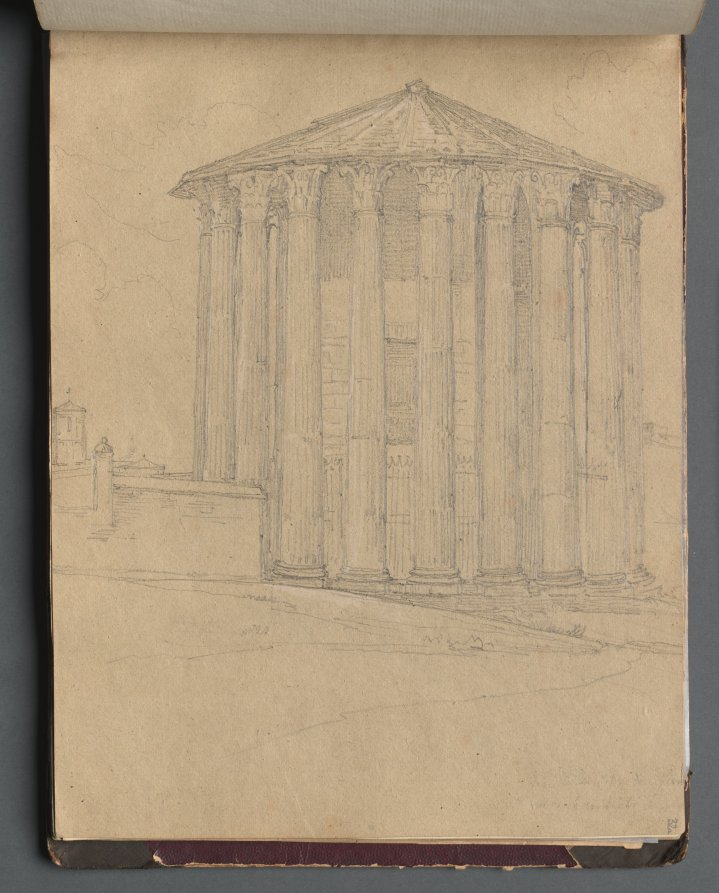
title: Album with Views of Rome and Surroundings, Landscape Studies, page 32a: Roman Temple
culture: Germany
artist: Franz Johann Heinrich Nadorp (German, 1794–1876)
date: c. 1830s-70s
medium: graphite on brown paper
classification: Bound Volume